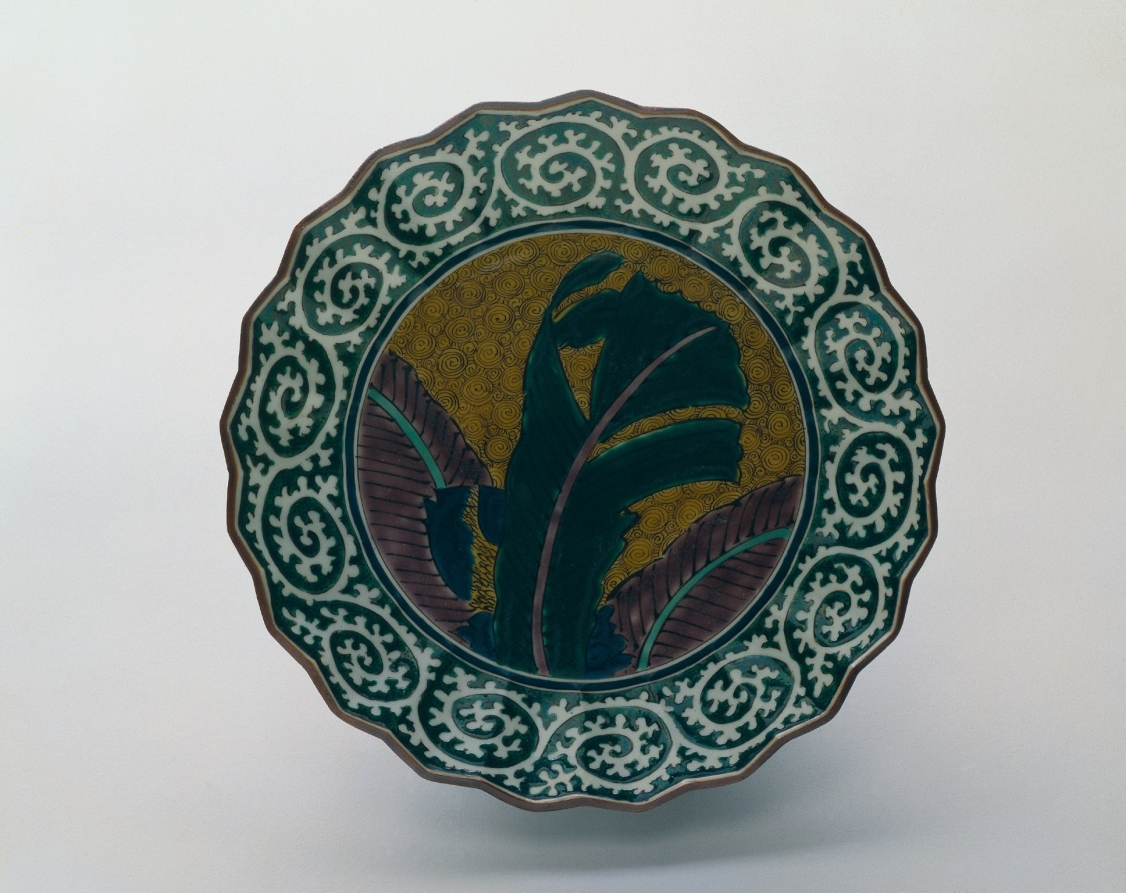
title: Foliate Dish with Banana Leaf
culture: Japan, Edo period (1615–1868)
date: mid-1800s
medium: porcelain with overglaze enamel decoration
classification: Ceramic